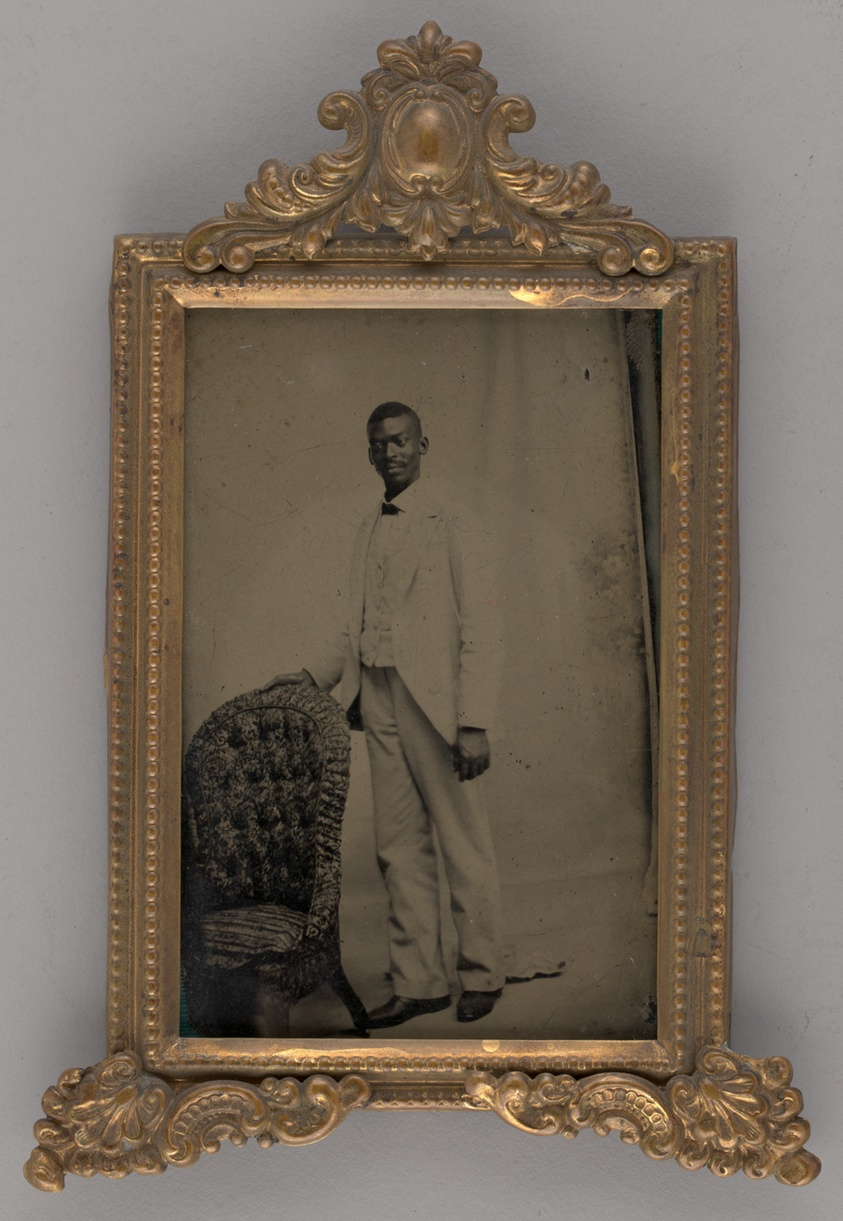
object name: Photograph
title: Untitled (Portrait of a Standing Man)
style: 19th century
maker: Unknown maker; American, 19th century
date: 1875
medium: Tintype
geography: United States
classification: portrait; photography; photographic process; photograph; tintype; portrait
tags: African American, photography, portrait, Male, portraits: male subject, men, lundberg collection, portraits, portraits: African American subject